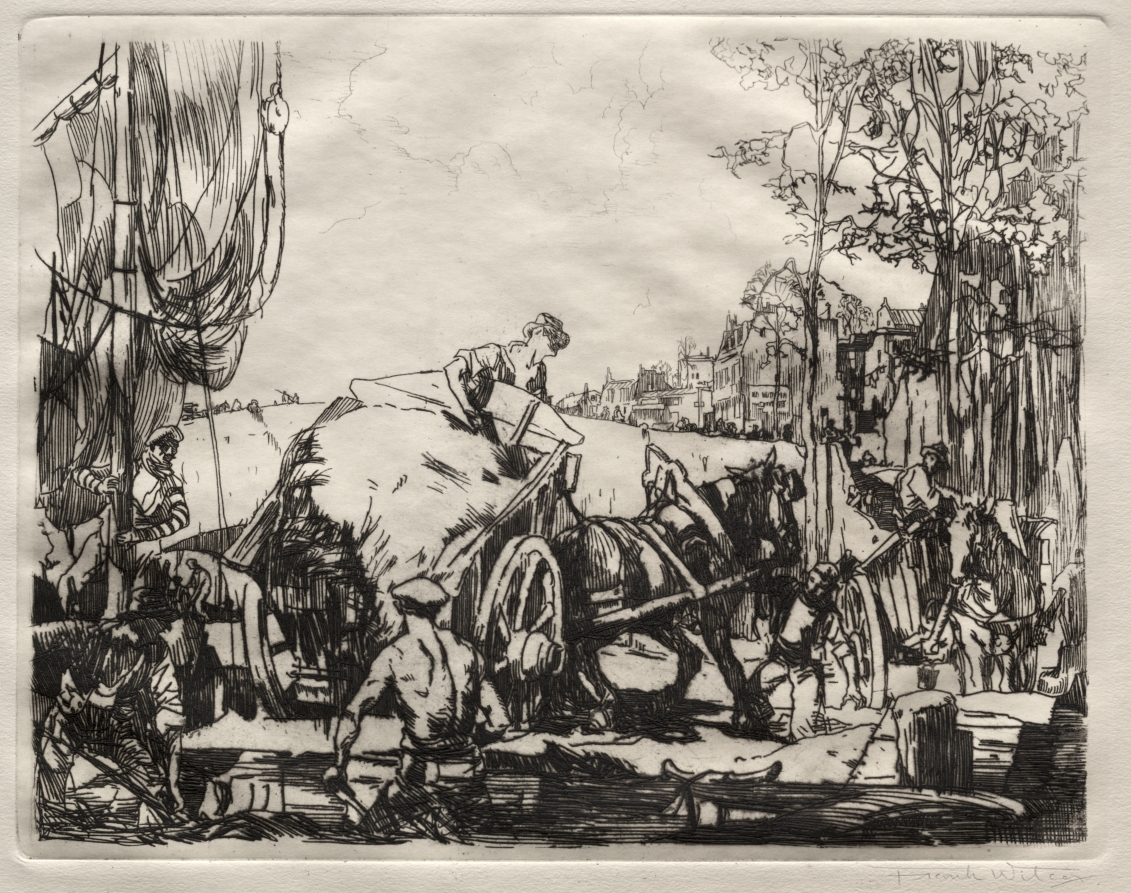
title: Port at Low Tide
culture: America, Ohio, Cleveland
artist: Frank Wilcox (American, 1887–1964)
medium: etching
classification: Print